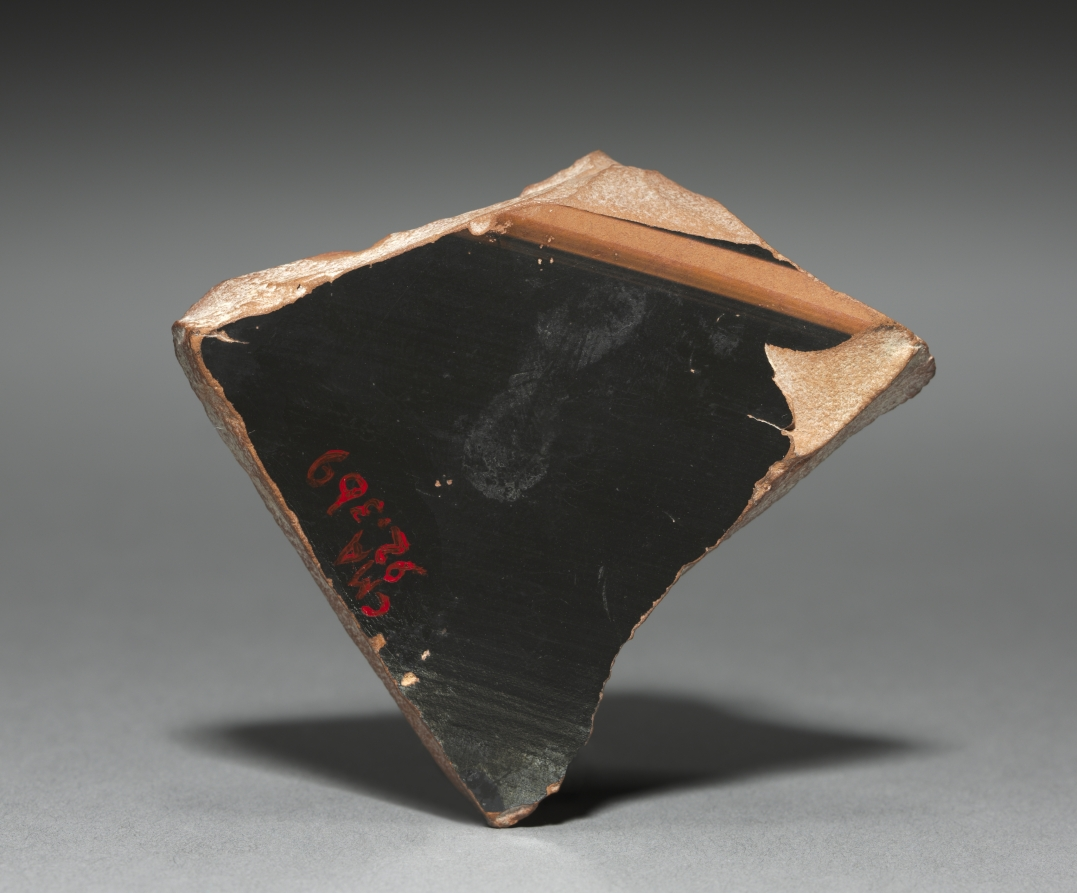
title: Fragment of a Red-Figure Bell-Krater or Calyx-Krater (Mixing Vessel): Female Head (Aglauros)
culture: Greek, Attic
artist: attributed to Nausicaa Painter (also known as Polygnotos III; Greek, Attic, active c. 460–440 BCE)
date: c. 460–450 BCE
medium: ceramic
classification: Ceramic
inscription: inscription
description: Broken from the upper wall of a large mixing vessel, this fragment shows the head of a woman wearing an earring and an elaborate ribbon in her hair. A faint inscription identifies her as Aglauros, a daughter of Kekrops, the mythical first king of Athens. Although worshipped in a shrine near the Acropolis, Aglauros appears quite rarely in Athenian art, usually with her sisters at the birth of Erichthonios, a future king.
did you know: An inscription identifies this woman as Aglauros, an Athenian princess.